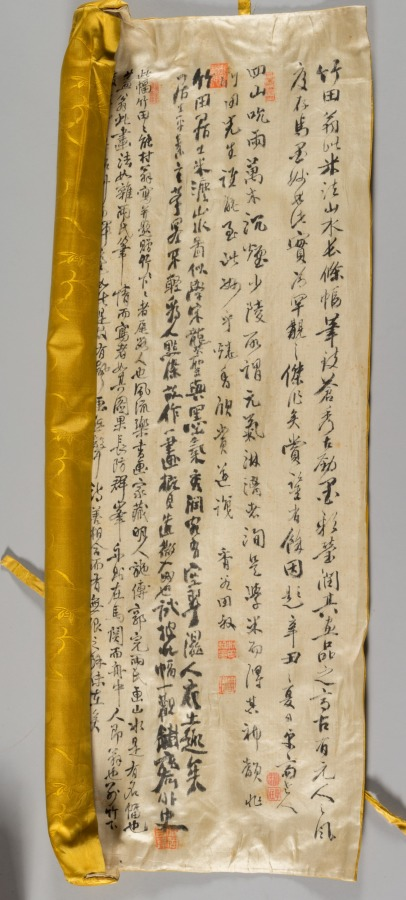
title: Mountain View and Blue Water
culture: Japan, Edo period (1615–1868)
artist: Tanomura Chikuden (Japanese, 1777–1835)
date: early 1800s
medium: hanging scroll; ink, color, and gold on paper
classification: Painting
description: Tanomura Chikuden was an eminent painter whose adopted son, Tanomura Chokunyū (1814–1907), was Seifū Yohei III’s painting teacher. This work was displayed at a gathering commemorating the 10th anniversary of Chokunyū’s death, something we know only because its custom-made box and archival documents have been carefully kept together. The box inscription also confirms that Chikuden was emulating the style of the Mi family of painters, active during China’s Southern Song dynasty (1127–1279). The painting’s Chinese-style silk wrapper is inscribed and sealed on its interior by members of Chokunyū’s community.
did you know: The mountain shapes are built up with multiple small wet strokes.